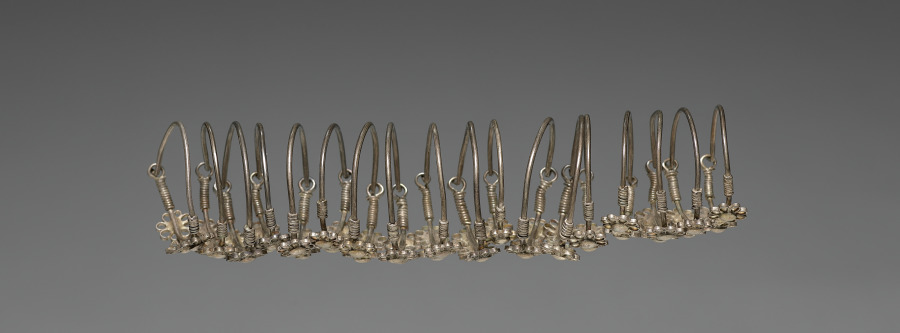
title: Eighteen Earrings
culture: India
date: 1800s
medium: silver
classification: Jewelry